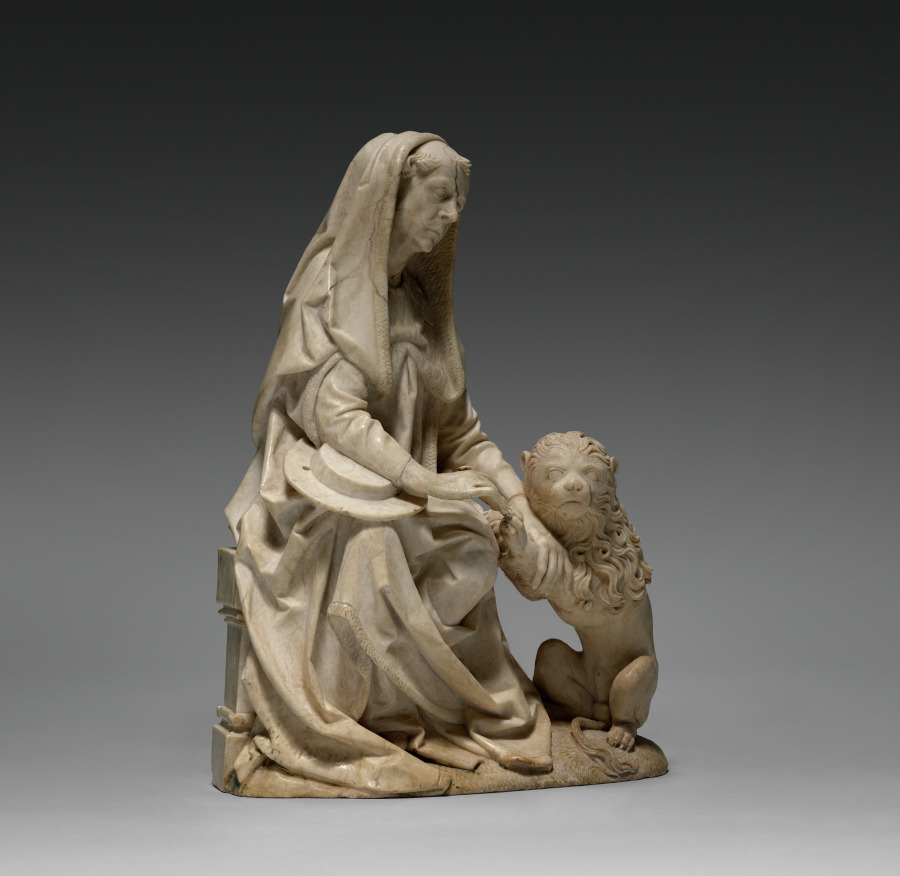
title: Saint Jerome and the Lion (From the former Church of St. Peter in Erfurt)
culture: Germany, Würzburg, late 15th Century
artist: Tilman Riemenschneider (German, active Würzburg, c. 1460–1531)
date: c. 1495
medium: alabaster, traces of polychromy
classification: Sculpture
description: According to legend, Saint Jerome (347–420 bce) lived in the desert, where he removed a thorn from an injured lion. Jerome is venerated in the Catholic Church as a Church Father, an important early author of Christianity. Here, he wears cardinal’s clothing from around 1500. Tilman Riemenschneider focused on Jerome’s relationship with the lion, creating empathy for the wounded animal. The delicacy of the depiction, which may have been partially painted to add highlights, is typical of alabaster, as is its fine polishing. The cord of the cardinal’s hat, missing today, may have been supplemented from another material.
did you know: In the story Saint Jerome encounters a fearsome lion, here depicted as diminutive, gentle, and submissive.